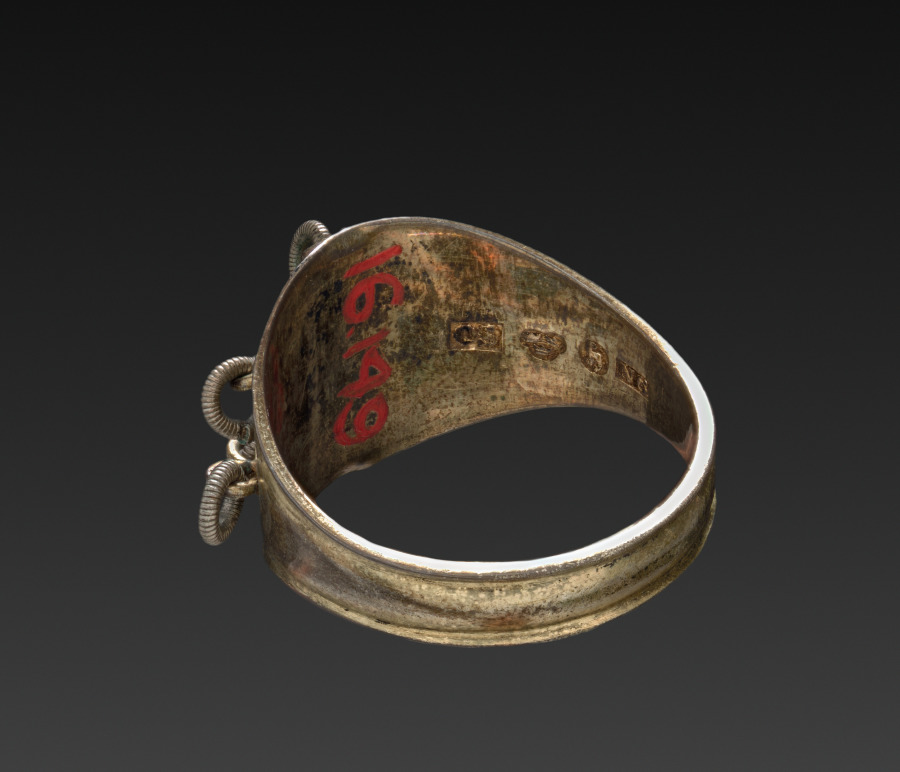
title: Ring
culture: Sweden, 18th-19th century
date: 1700s - 1800s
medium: silver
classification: Jewelry